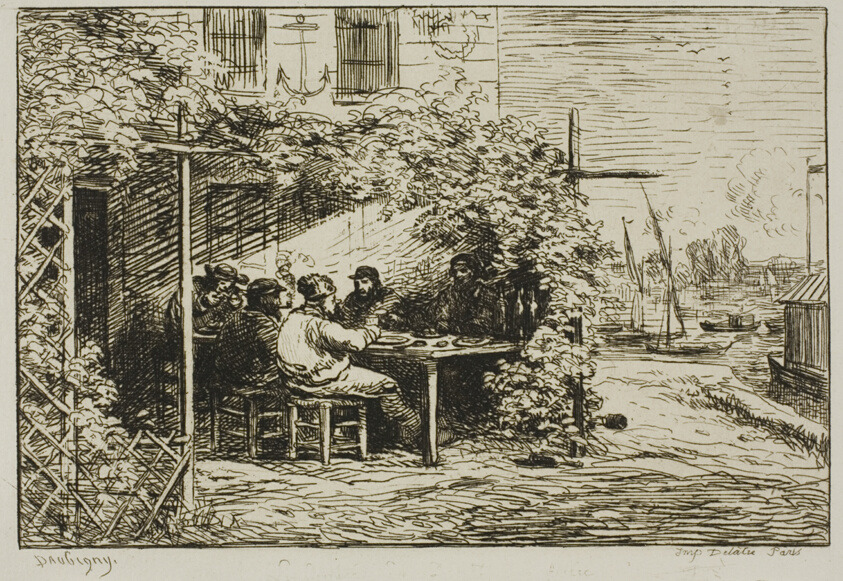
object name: Print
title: Departure Breakfast at Asnières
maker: Charles François Daubigny (French, 1817-1878)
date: 1861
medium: Etching on ivory laid paper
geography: France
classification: etching; print; prints and drawing